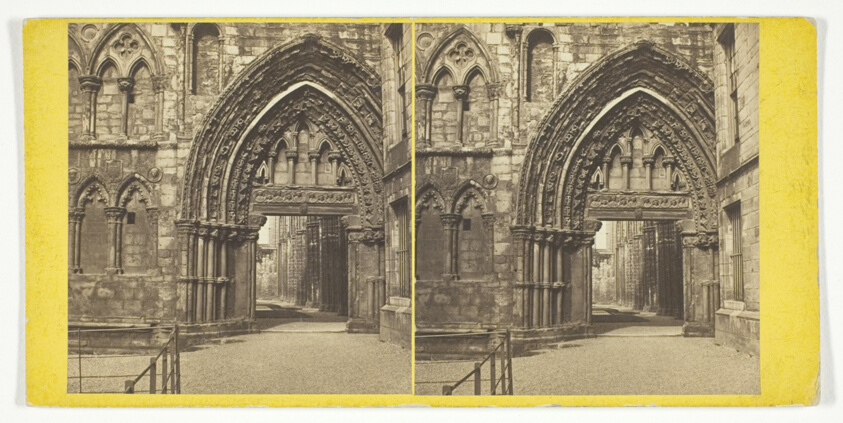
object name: Photograph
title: Door of Holyrood Abbey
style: 19th century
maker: Archibald Burns (Scottish, died 1880)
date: 1867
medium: Albumen print, stereo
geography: Edinburgh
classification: photography; photograph; albumen silver print; stereograph (albumen)